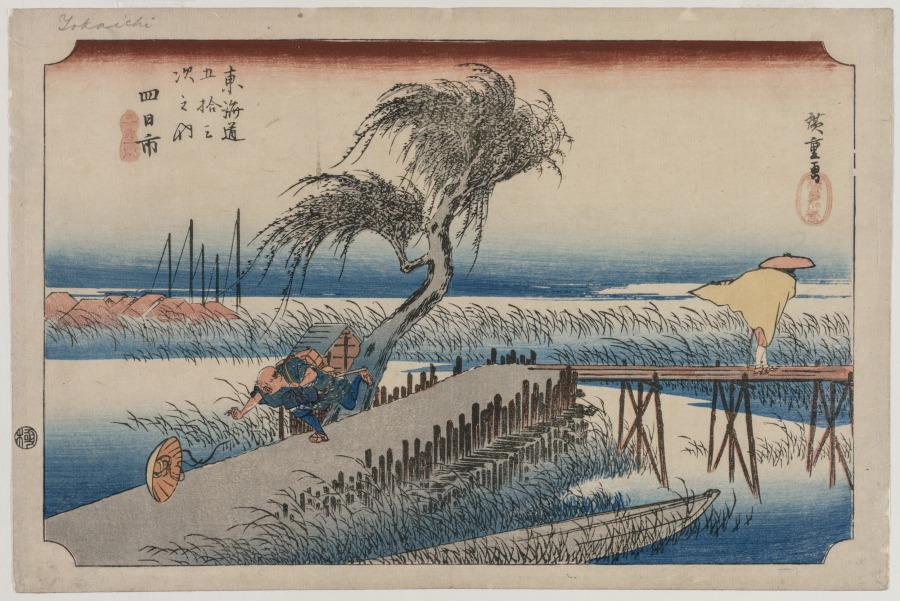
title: Yokkaichi: View of the Mie River, from the series The Fifty-Three Stations of the Tōkaidō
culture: Japan, Edo period (1615–1868)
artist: Utagawa Hiroshige (Japanese, 1797–1858)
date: c. 1833–34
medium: Color woodblock print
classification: Print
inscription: Signature: Hiroshige ga Publisher: Takenouchi Magohachi (Hoeido) Seal: kiwame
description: This print is from the first Tōkaidō series by Hiroshige. Yokkaichi was historically known for a major market held there on the fourth day of every month. However, instead of the market, Hiroshige has chosen to present a windy scene in the marshes along the Mie River just outside the town. No written records survive to indicate why Hiroshige chose the marshes over the market, but the result is a dynamic display of the power of wind.